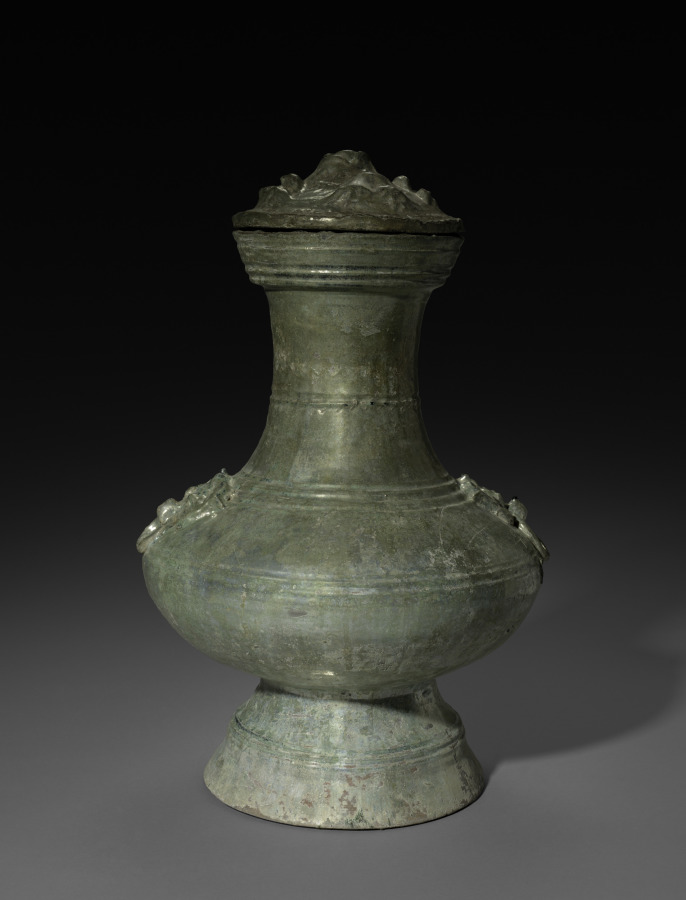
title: Covered Jar (Hu)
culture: China, Eastern Han dynasty (25–220 CE)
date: 25–220 CE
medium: earthenware with lead glaze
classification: Ceramic